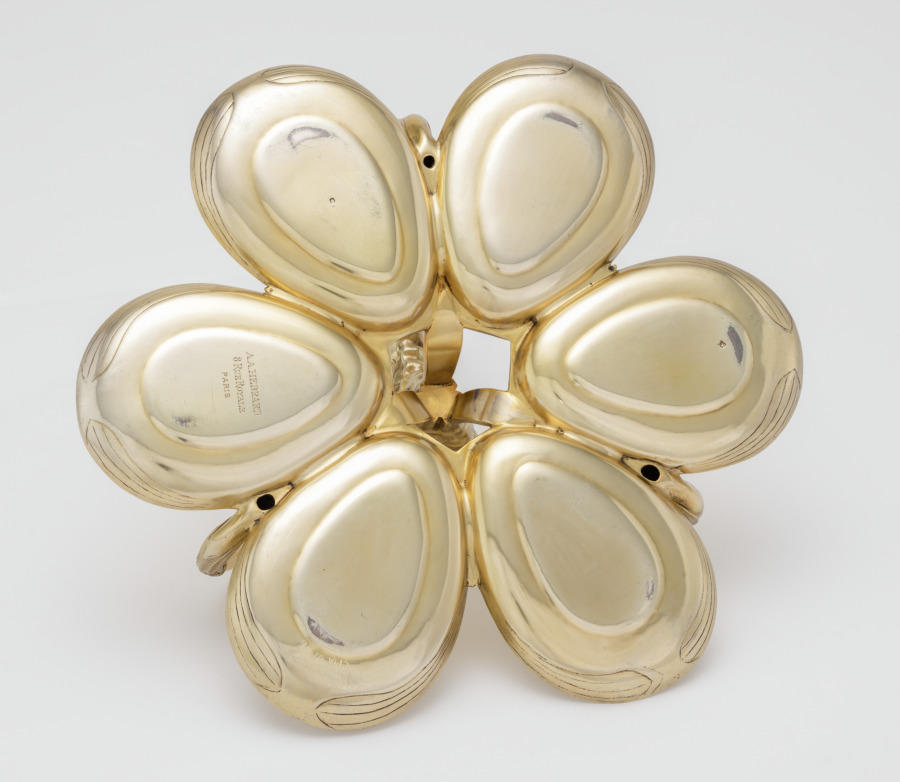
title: Salver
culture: France, Paris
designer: Carlo Bugatti (Italian, 1856–1940)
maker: Adrien-Aurélien Hebrard (French, 1866–1937)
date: c. 1907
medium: Gilt silver and ivory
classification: Silver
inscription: inscribed inside one of six ovoid compartments: "Bugatti" in ligature. Engraved on back: A.A. HEBRAND/ 8 RUE ROYAL/PARIS FRANCE.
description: This tea and coffee service, salver, and table, together with some now missing cups, were all designed by Carlo Bugatti as an ensemble and presented at the 1902 exposition devoted to decorative arts in Turin, Italy. The set was probably acquired from Bugatti's 1907 exhibition at the Galerie Hébrard in Paris by a wealthy South African widow, Anna Blake, who was living there at the time. Some of the animal and insect motifs suggest mythical beasts or the fossils of prehistoric animals. When Mrs. Blake returned to Cape Town, she took these and other pieces designed by Bugatti with her, and they remained in South Africa throughout her lifetime.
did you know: Carlo Bugatti's sons achieved illustrious careers of their own. Rembrandt Bugatti (1884-1916) became a celebrated sculptor, and Ettore Bugatti (1881-1947) manufactured luxurious automobiles and racing cars.